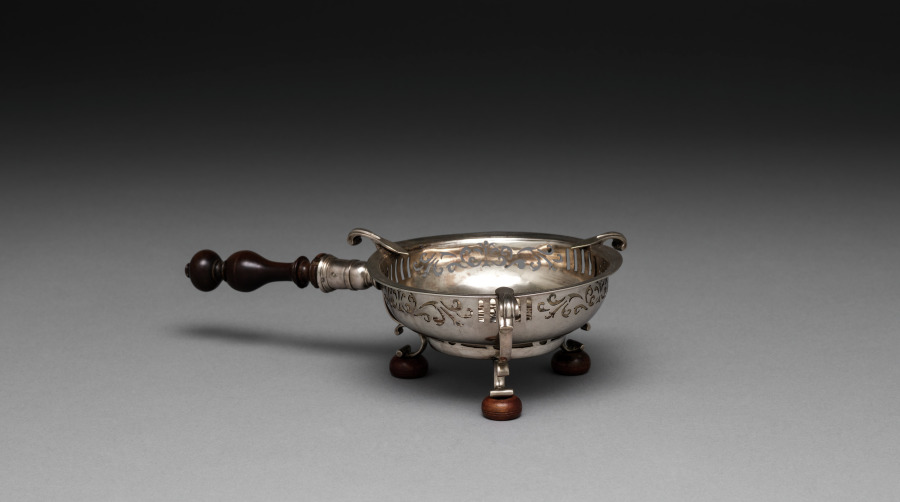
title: Chafing Dish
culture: America, Massachusetts and Connecticut, 18th century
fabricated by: John Potwine (American, 1698–1792)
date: c. 1730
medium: silver, wooden handle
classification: Silver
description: A small candle would have been placed under this dish for keeping the contents warm at the table.